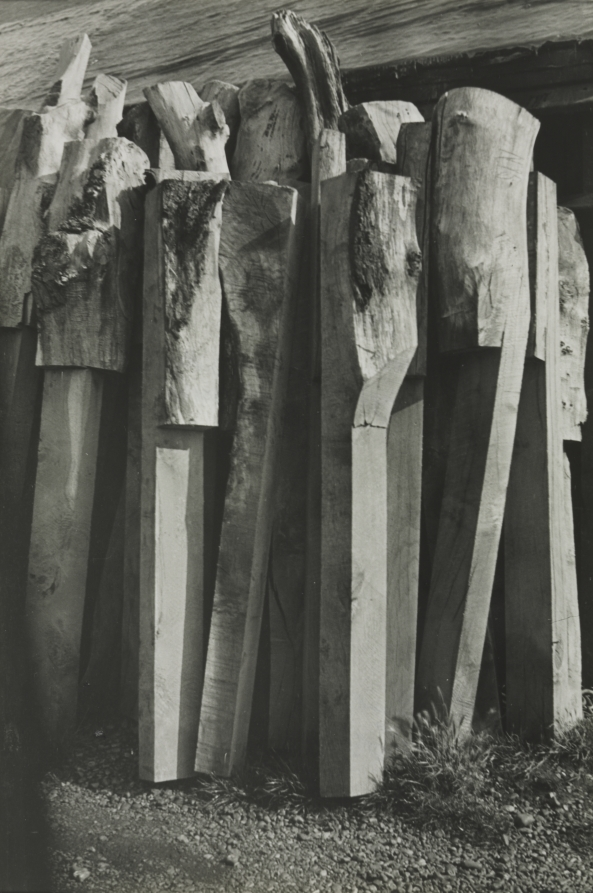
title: Totems, Old Shipyard, Rye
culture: England, 20th century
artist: Paul Nash (British, 1889–1946)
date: 1932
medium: gelatin silver print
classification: Photograph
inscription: Written in black ink on verso: "Printed from Paul Nash's/original negative./This was illustrated in/the artist's book of his/photographs,/'Fertile Image'/plate No.62./"Totems, Old Shipyard, Rye" (bought from Margaret/Nash.)/1951." Written in blue ink: "Mrs. Paul Nash/Copyright" Written in pencil: "62"